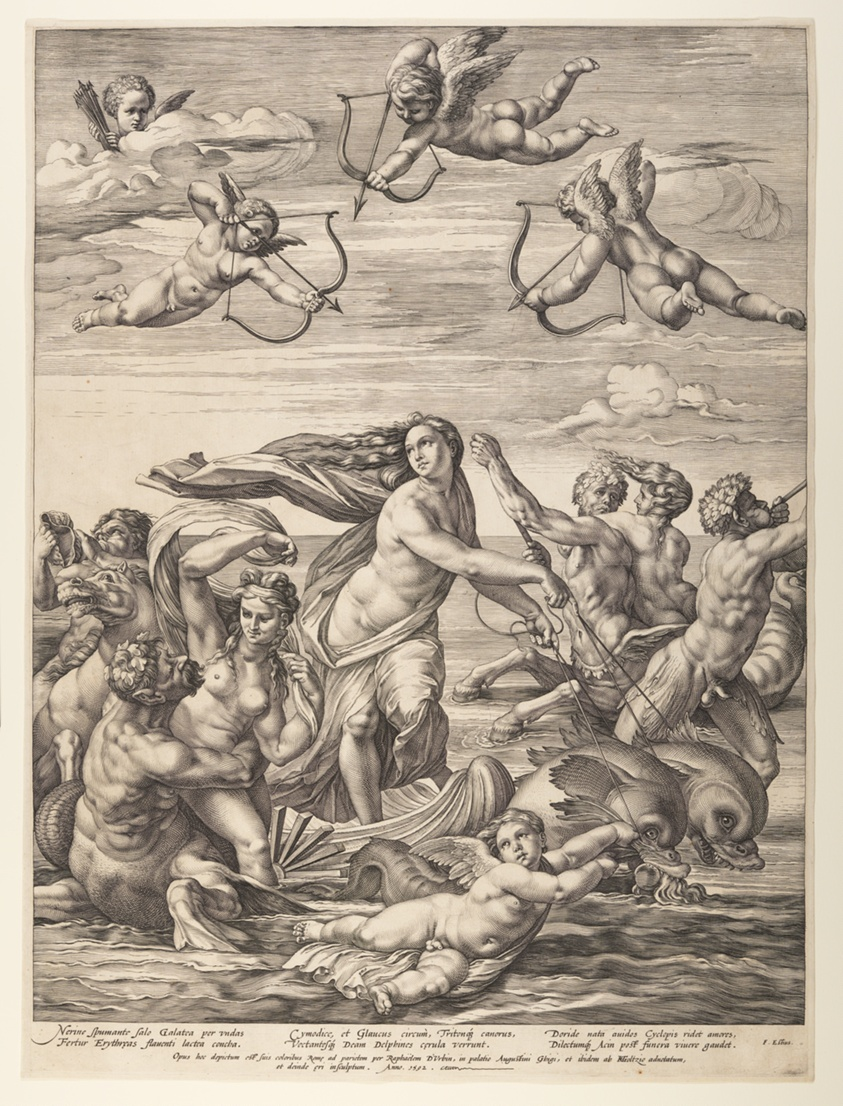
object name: Print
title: The Triumph of Galatea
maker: Hendrick Goltzius (Dutch, 1558–1617); after Raphael (Italian, 1483–1520)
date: 1592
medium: Engraving on ivory laid paper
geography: Netherlands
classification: engraving; paper; print; prints and drawing